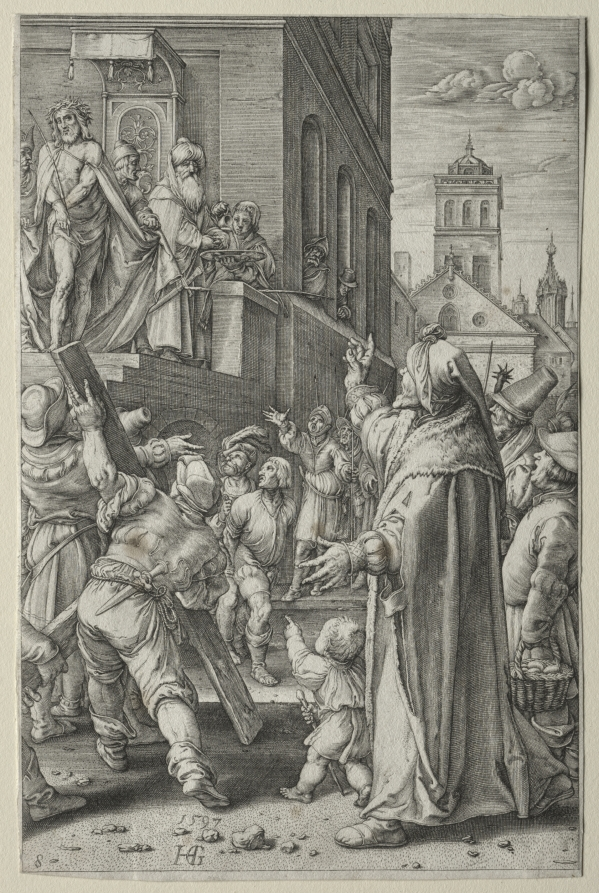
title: The Passion: Ecce Homo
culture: Netherlands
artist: Hendrick Goltzius (Dutch, 1558–1617)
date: 1597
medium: engraving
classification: Print